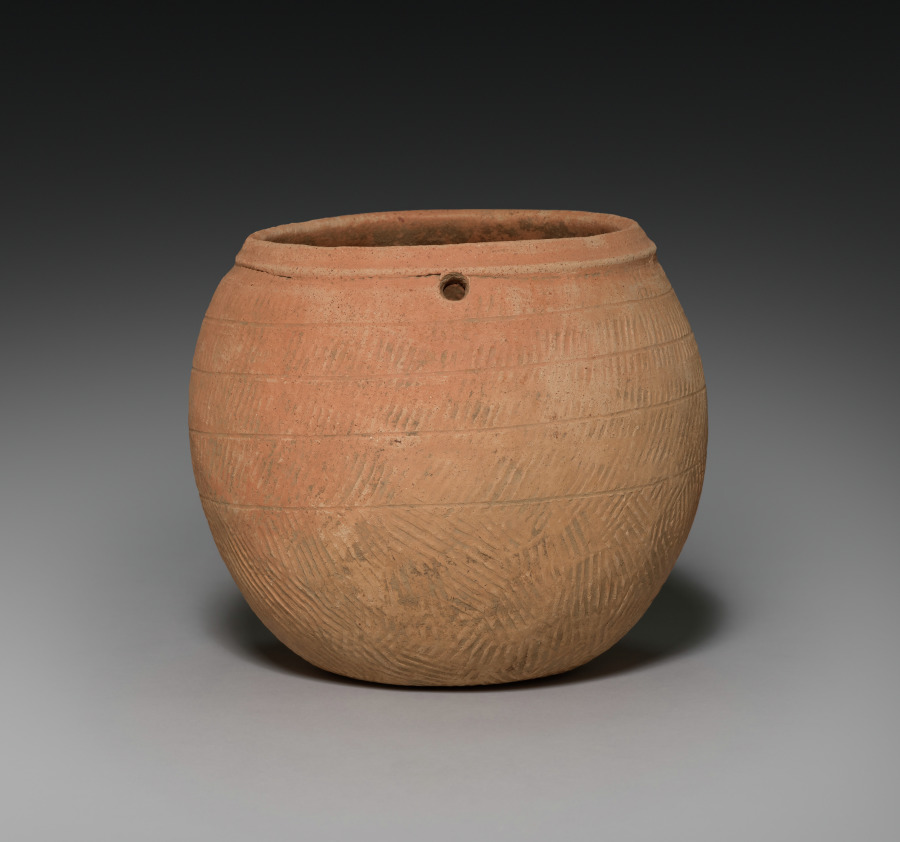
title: Lidded Vessel with Loop Handles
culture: Korea, Iron Age (c. 300–57 BCE)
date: 300–1 BCE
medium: earthenware, with impressed, paddled, and incised decoration and red slip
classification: Ceramic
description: This small storage jar was hand built from coils of clay before it was finished on a potter's wheel. The thick, vertical ridges covering the surface were impressed into the wet clay using a carved wooden paddle. This network of raised lines was then intersected by four incised lines coursing around the bulbous form and separating the body into lower and upper areas with deft visual simplicity. Such direct, effective design solutions to ceramic decoration appear frequently in early Korean ceramics. The two perforations in the upper body were no doubt used to help secure the lid to the body with cord.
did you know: Closed kilns built on hills became widely used for producing this type of pottery vessel in Korea during the Three Kingdoms period.